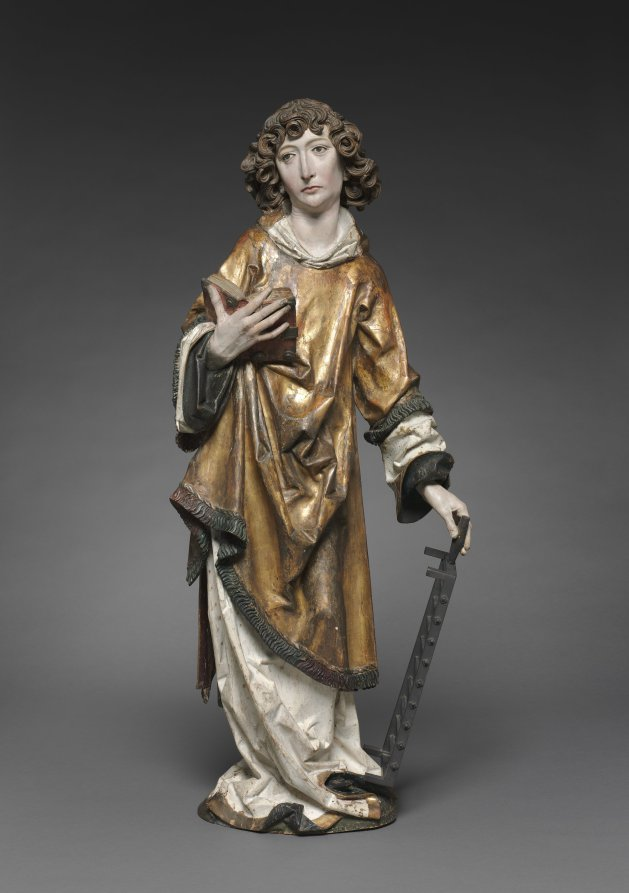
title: Saint Lawrence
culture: Germany, Würzburg, 16th century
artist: Tilman Riemenschneider (German, active Würzburg, c. 1460–1531)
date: 1502–8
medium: lindenwood with polychromy and gilding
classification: Sculpture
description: This sculpture, along with that of Saint Stephen (1959.43), and two female saints preserved in Frankfurt (Historisches Museum), are believed to be the remaining fragments of a large altarpiece carved by Riemenschneider for the Dominican convent in Rothenburg in Franconia (demolished in 1813). Saints Stephen and Lawrence both wear the dalmatic to indicate their status as deacons in the early church. Each holds a symbol of his martyrdom; here, Saint Lawrence holds a grill to indicate his death by burning. Late Gothic Style Art in Germany through the early 1500s remained firmly anchored in the late Gothic style with its associated interests in realism. Riemenschneider was one of the most prolific and versatile sculptors of this style, a recognized master in both stone and wood. His flourishing workshop employed as many as 40 apprentices in sculpting, woodcarving, and painting. His sculptures are noted for the dreamy, melancholy, and introspective quality in their expressions, as well as their remarkable attention to detail.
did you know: Before Riemenschneider finally settled in Würzburg, Germany, in 1484, he traveled to Strasbourg and Colmar, where he became acquainted with the works of the engraver Martin Schongauer.